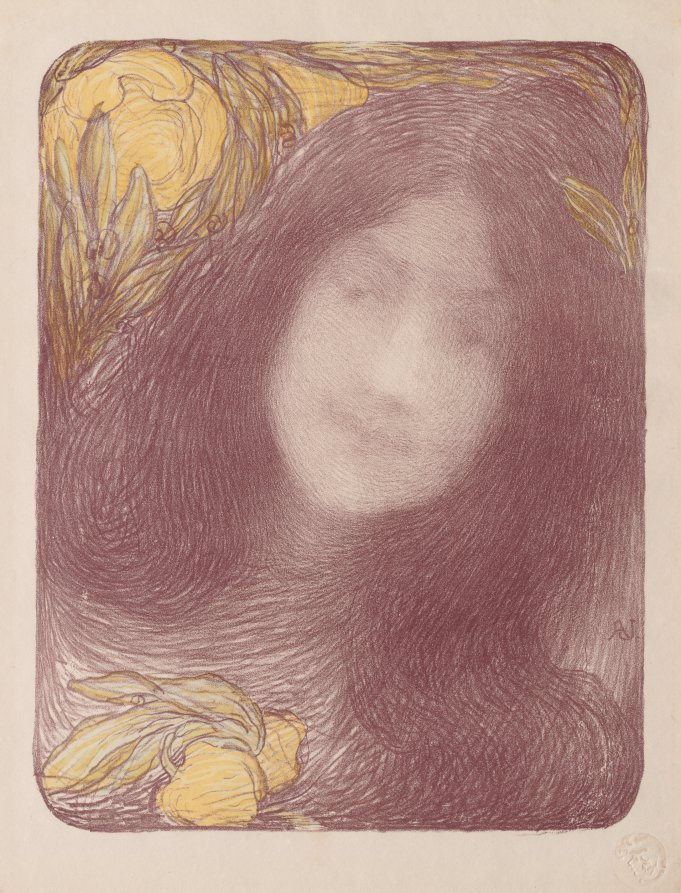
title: Under the Flowers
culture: France, 19th century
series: L'Estampe Originale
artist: Edmond François Aman-Jean (French, 1858–1936)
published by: : L'Estampe moderne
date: c. 1893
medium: color lithograph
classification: Print